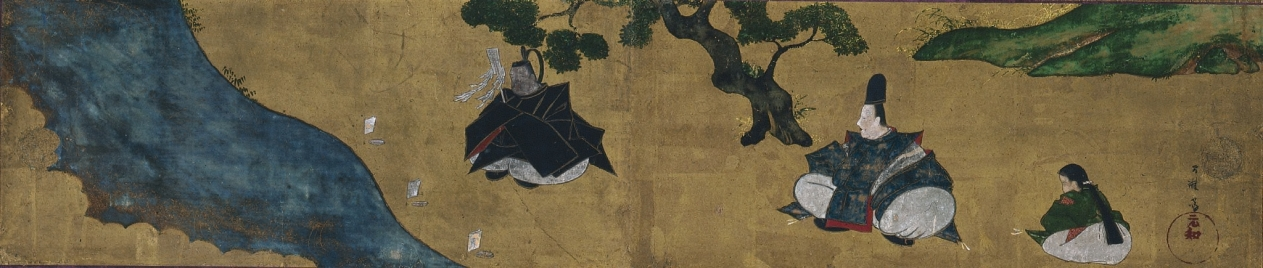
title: Ablution Scene (Misogi)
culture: Japan, Edo period (1615–1868)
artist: Tawaraya Sōri (Japanese, active late 1700s)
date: late 1700s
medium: hanging scroll, ink, color and gold leaf on paper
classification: Painting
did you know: Three clues to this composition’s original format—a pair of doors to a cabinet shelf—are the two circles at either end, the seam down the center, and the size of the image.